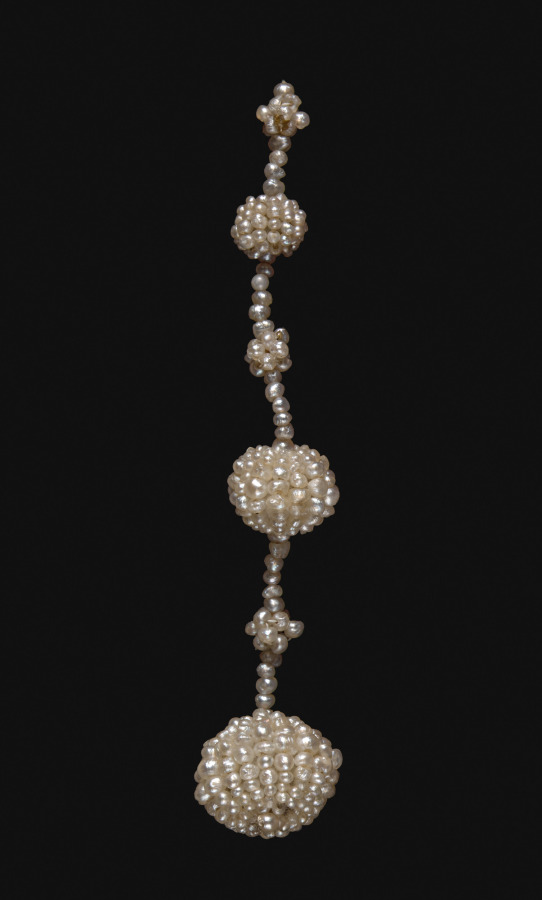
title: Earring (Parure)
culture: England, 19th century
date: c. 1850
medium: seed pearl on Mother-of-Pearl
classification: Jewelry